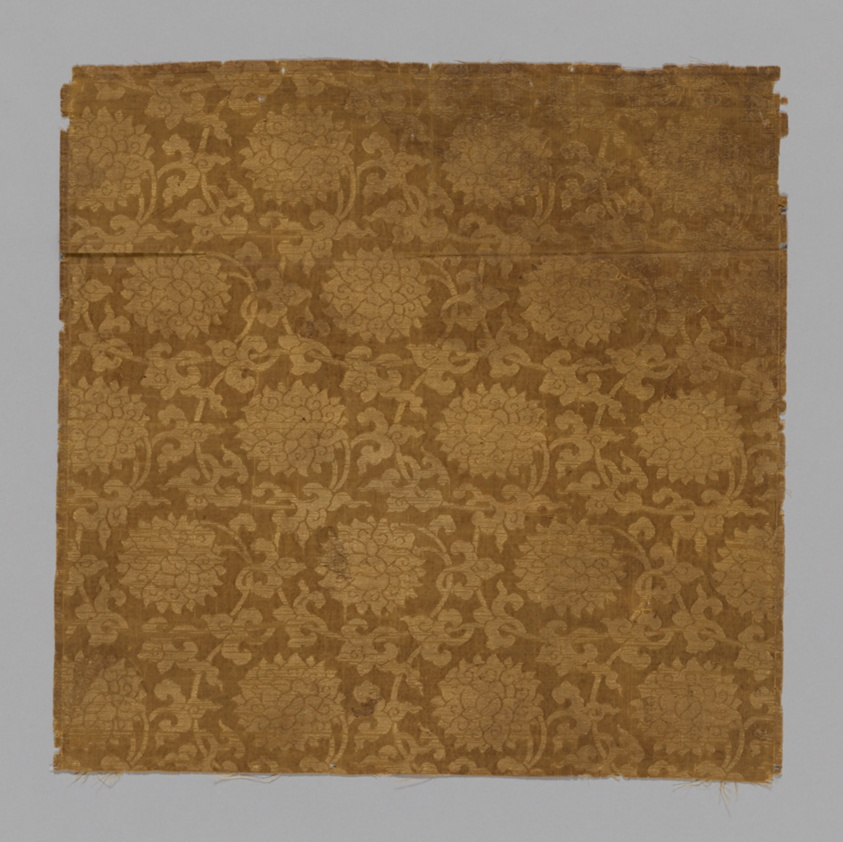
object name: Textile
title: Fragment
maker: China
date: 17th/18th century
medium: Brocaded plain simple twill, silk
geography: China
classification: textile; weaving